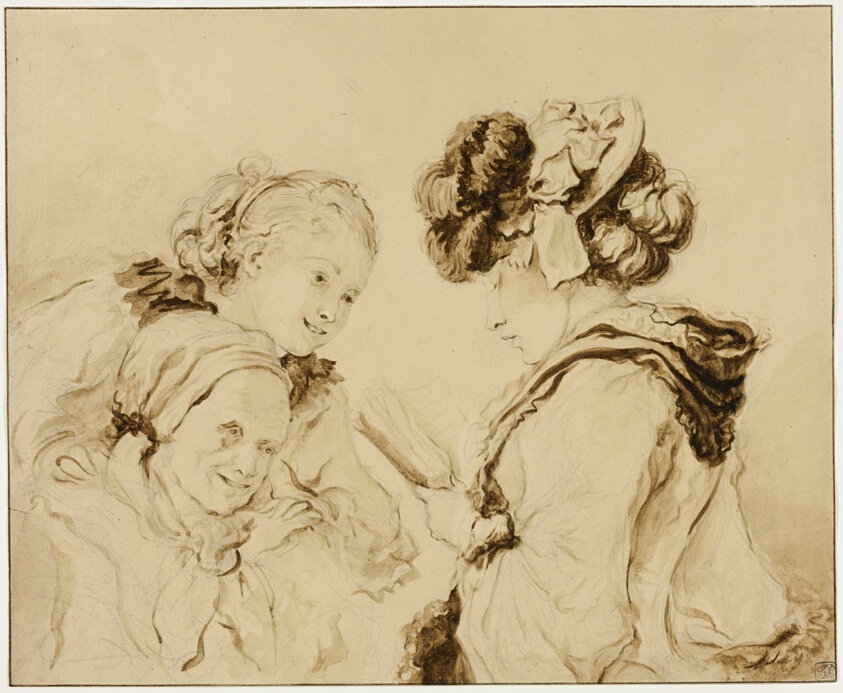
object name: Drawing and Watercolor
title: Margaruerite Gerard Reading to Her Mother and Rosalie Fragonard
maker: Style of Jean-Honoré Fragonard; French, 1732-1806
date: c. 1785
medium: Brush and brown wash, and graphite, on tan laid paper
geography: France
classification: ink or chalk wash; drawings (visual works); prints and drawing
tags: mothers, parents, children